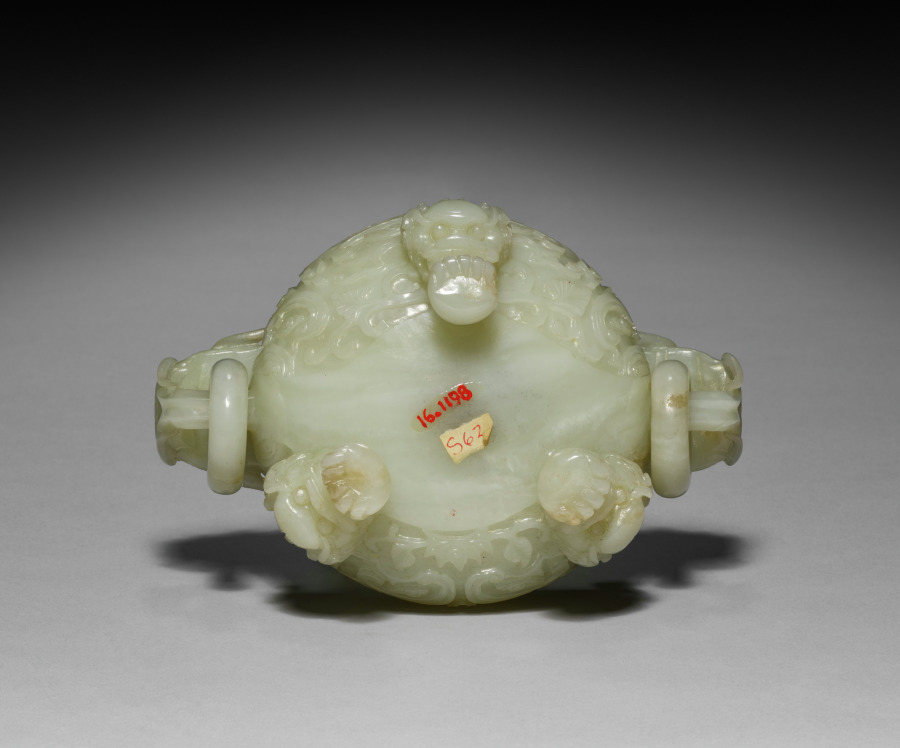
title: Tripod Incense Burner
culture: China, Qing dynasty (1644-1911)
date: 1644–1911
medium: jade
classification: Jade